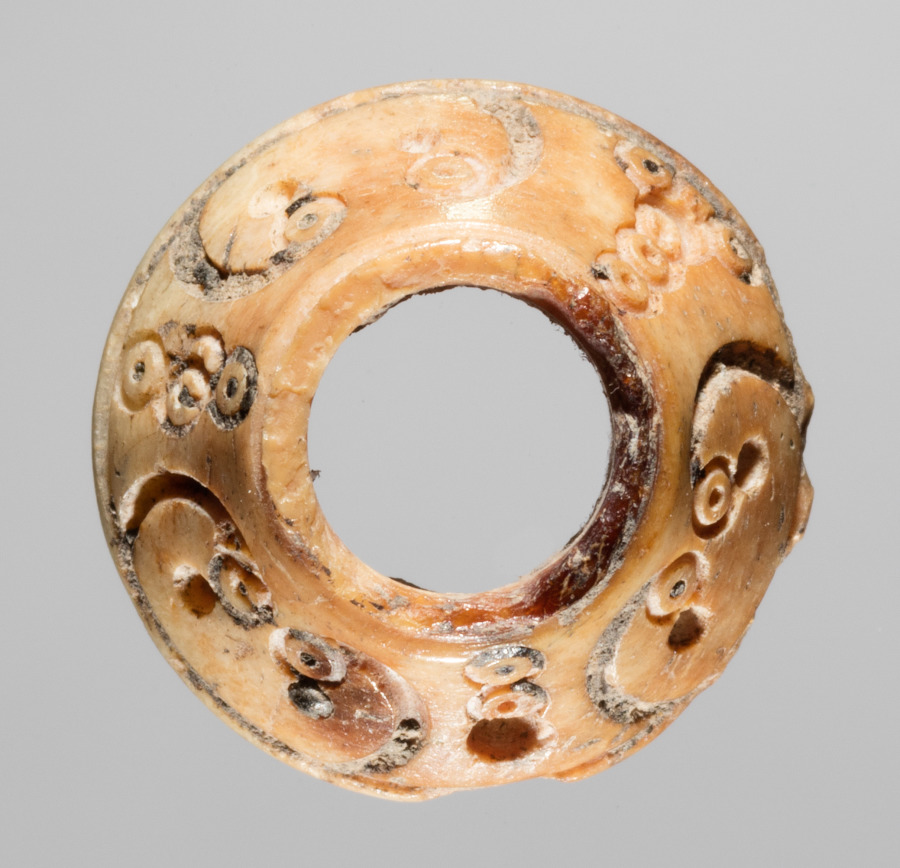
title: Spindle Whorl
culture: Iran, early Islamic period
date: 700s - 900s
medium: bone, incised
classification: Spindle Whorl